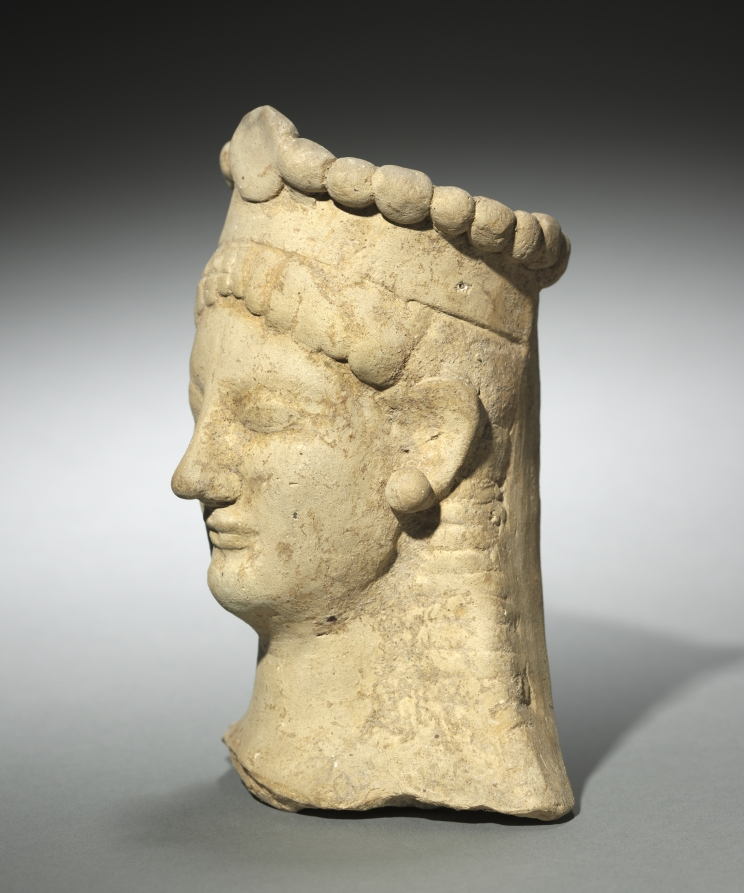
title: Woman's Head with Crown and Earrings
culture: Greece, Sicily(?)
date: 600–475 BCE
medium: terracotta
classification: Sculpture